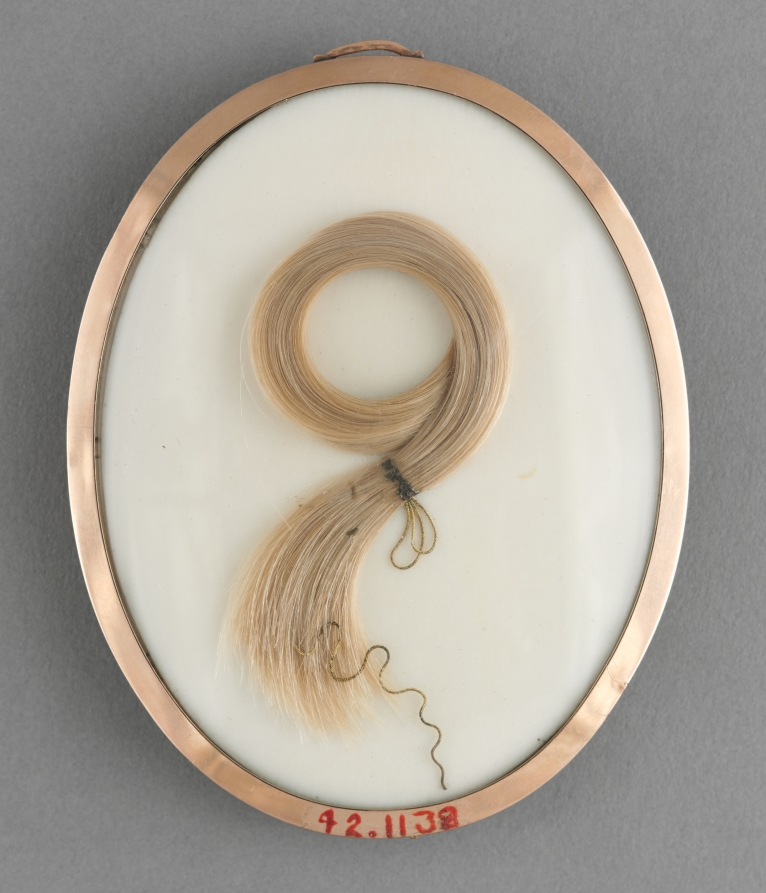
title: Portrait of the Hon. Anne Annesley, later Countess of Mountnorris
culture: England, 19th century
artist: Richard Cosway (British, 1742–1821)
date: c. 1800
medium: watercolor on ivory in a gold frame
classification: Portrait Miniature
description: Anne Annesley (née Courtenay, 1774–1835) was the eighth daughter of William 2nd Viscount Courtenay, and sister of William 3rd Viscount Courtenay, who commissioned numerous paintings of himself and his six sisters from Richard Cosway in oil and miniature. William’s expenditure for these works between 1790 and 1812 reached £1,370, a bill that wasn’t paid in full until 1820. Anne married George Annesley, later 2nd Earl of Mountnorris, in September 1790. Cosway, who frequently depicted female sitters in gauzy white gowns, lavished attention on Anne’s attire. Her pale yellow coat is lined with fur that is sensitively delineated with a combination of short brushstrokes distinct from those that form her dark, wavy hair. Fur-trimmed jackets like this one would probably have been worn indoors by women during the colder months.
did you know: Another version of this portrait is nearly identical to the Cleveland miniature and was likely for another friend or member of Anne's family.